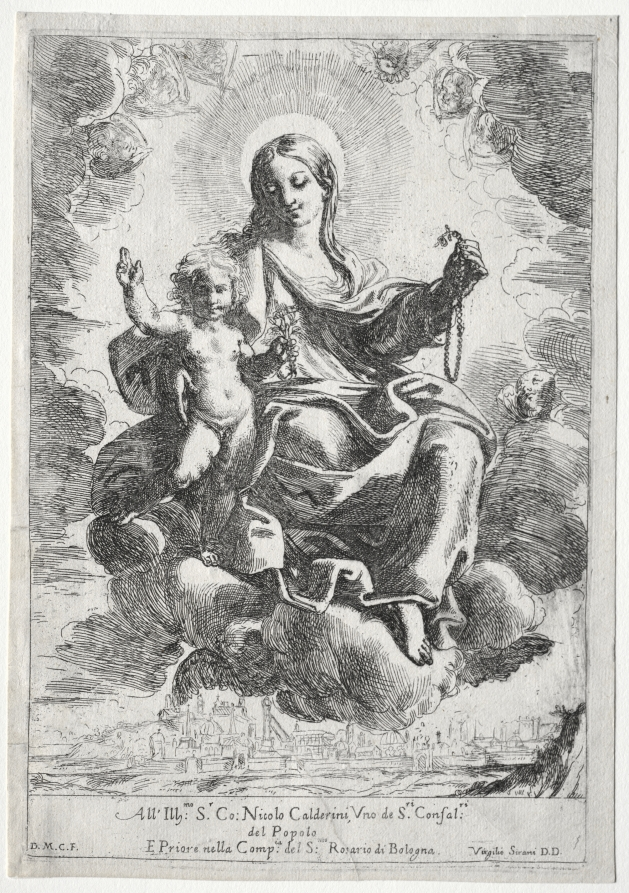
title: Madonna of the Rosary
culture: Italy, 17th century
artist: Domenico Maria Canuti (Italian, 1620–1684)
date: 1645–84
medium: etching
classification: Print